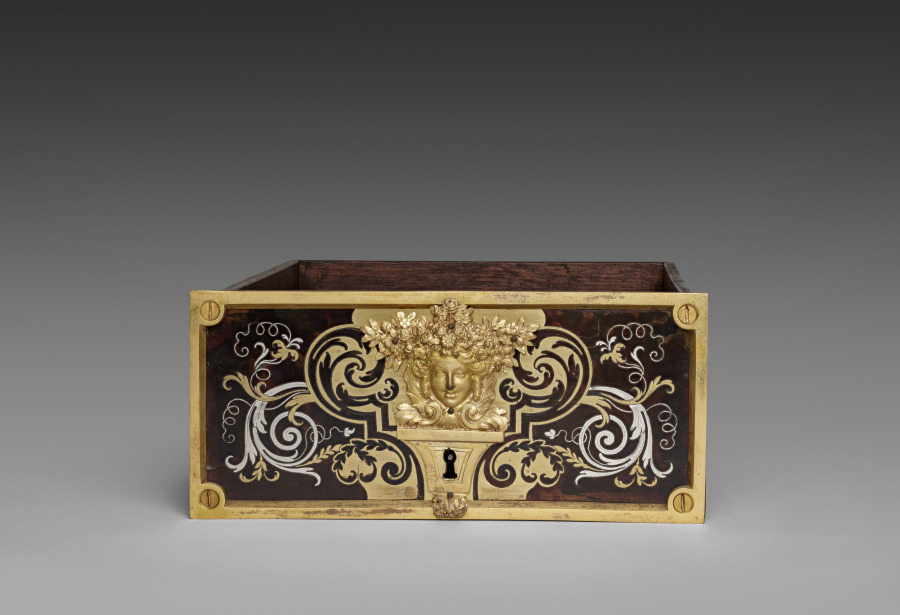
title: Side Drawer for Cabinet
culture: France, late 17th Century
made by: André-Charles Boulle (French, 1642–1732)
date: c. 1690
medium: ebony, marquetry in metal and tortoise shell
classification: Furniture and woodwork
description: Appointed cabinetmaker to King Louis XIV in 1672, André-Charles Boulle became a master of furniture making in France during the late 1600s until his death in 1732. Known primarily for his use of marquetry, in which metal patterns are inlaid into tortoiseshell then applied within the veneered surface of the furniture, Boulle established a level of quality and craftsmanship few others could achieve. As a result, his work found favor at the royal court and among other aristocrats and diplomats eager to impress the king. The inclusion of a medallion depicting Louis XIV within the bronze decoration of this chest would have identified the owner with the royal court. Often exhibiting stout architectural proportions with elegant groups of inlaid motifs such as the parrot on the central panel of this chest, Boulle’s designs are an example of the intellectual fashion for contrasting ideas, materials, and motifs.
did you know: Originally designed to sit atop an elaborate tall stand, this chest was likely altered in the late 1700s to reduce its scale and height.